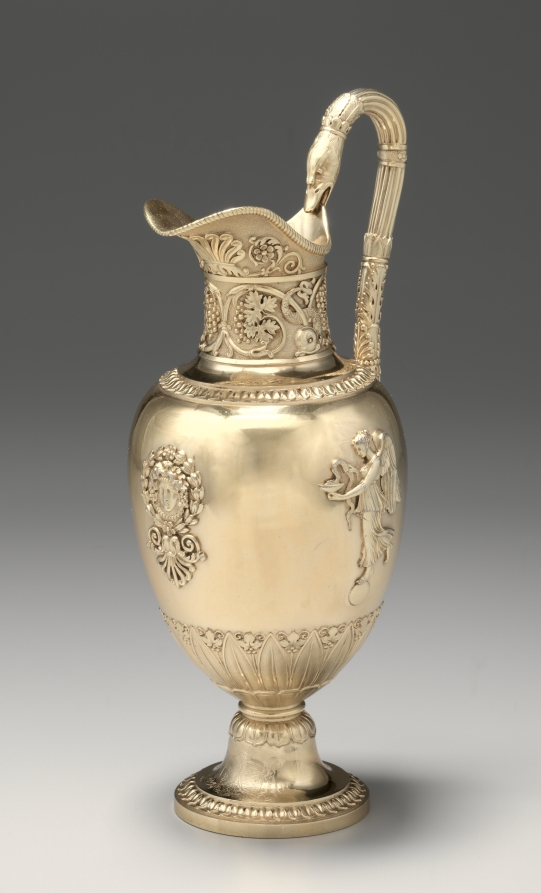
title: Ewer (aiguière)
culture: France, 19th century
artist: Jean Baptiste Claude Odiot (French)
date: c. 1817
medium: silver gilt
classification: Silver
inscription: [Excise mark for medium-sized work, Paris, 1809-1819, on edge of base]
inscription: [Two maker's marks of Jean-Baptiste-Claude Odiot after the Revolution, inside foot]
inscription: [Official assay mark for first standard silver, Paris, 1809-1819, near exterior upper rim]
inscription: [Applied coat of arms of the count Alfred de la Chapelle, Seigneur of Morton and Beaulieu, Périgord “accolé” with an alternate version of de la Chapelle, exterior of foot]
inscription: [Struck twice, interior foot]: "ODIOT"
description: Jean-Baptiste-Claude Odiot’s reputation stretched internationally. Commissioned by Russian count Nikolei Demidoff, this ewer was one part of an extensive silver dinner service. Decorated with motifs of classical antiquity, this object’s Greco-Roman silhouette, grape vine frieze, raised mythological figures, and sinuous swan’s neck handle were likely inspired by the designs of Charles Percier and Pierre-François Fontaine, architects of Napoleon I.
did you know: The coat of arms on the foot of this ewer belongs to the count Alfred de la Chapelle who owned this silver dinner service during the second half of the 19th century.